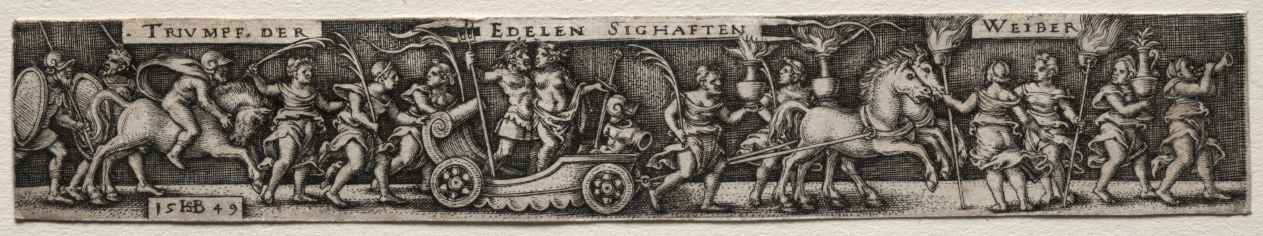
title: The Triumph of Women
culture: Germany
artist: Hans Sebald Beham (German, 1500–1550)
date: 1549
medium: engraving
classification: Print